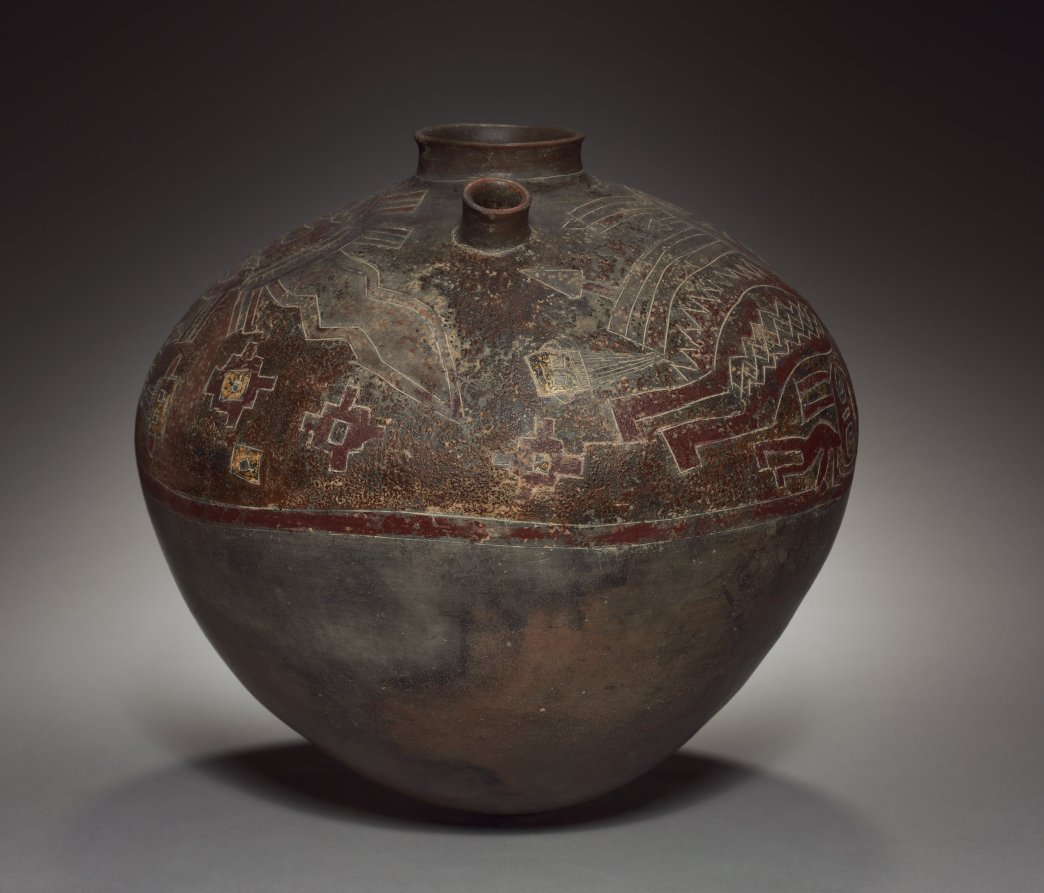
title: Vessel with Oculate Being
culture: Peru, South Coast, Paracas (Cavernas) style (700 BCE–1 CE)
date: 300 BCE–1 CE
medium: earthenware with resin-based paint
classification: Ceramic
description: A supernatural creature known today as the Oculate Being, after its huge eyes, became prominent late in Paracas times. The Paracas left no written records and this creature's meaning is poorly apprehended, but it clutches a severed human head by the hair. A hint of the head's significance comes from the Oculate Being itself, whose head sprouts streamers that may represent abstract energy or force. The severed head cult, then, may have aimed at capturing and redirecting this energy. (Other Paracas objects appear nearby.)